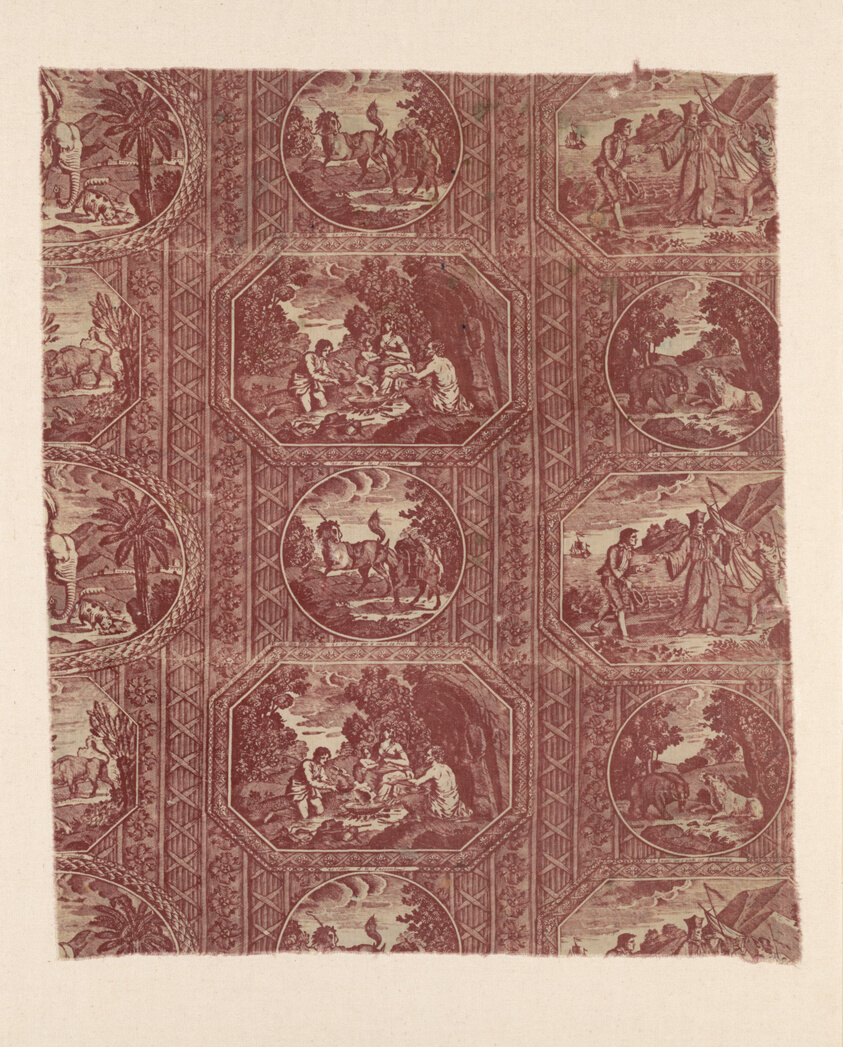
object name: Textile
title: Eight Fables of La Fontaine (Furnishing Fabric)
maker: After Jean Baptiste Oudry (French, 1686–1755); Manufactured by Hartmann et Fils (French, founded 1776); France, Munster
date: c. 1810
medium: Cotton, plain weave; copperplate printed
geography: Munster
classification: textile; weaving - printed; furnishing textile